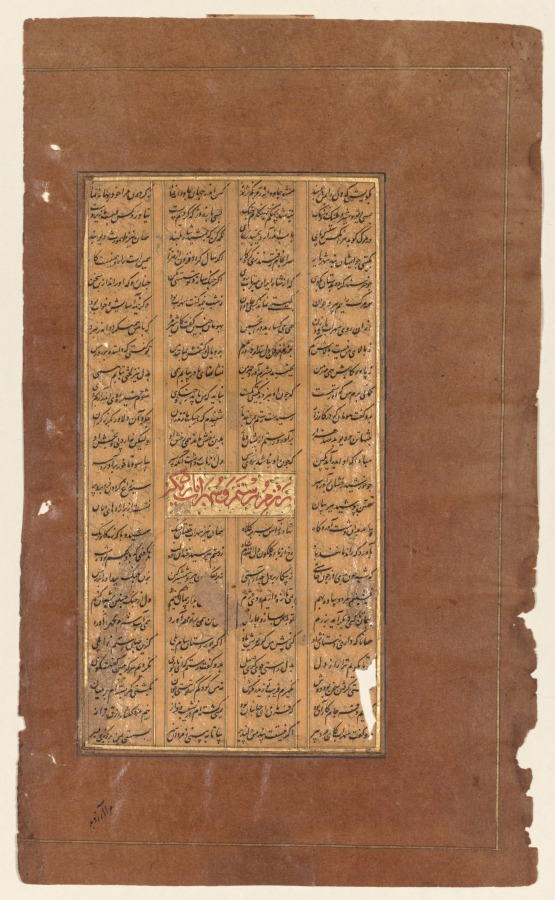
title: Text of Rustam and Suhrab, from the Shah-nama of Firdausi (Persian, c. 934–1020) (verso)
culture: India, Bijapur, Deccan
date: c. 1610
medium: Gum tempera, ink, and gold on paper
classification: Painting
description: This page of text from the jewel-like copy of the Shah-nama made in the southern Indian city of Bijapur describes the events leading to Rustam’s accidental slaying of his own son Suhrab. The larger text in red is a chapter heading, which reads: “The single combat between Rustam and Suhrab once more.”